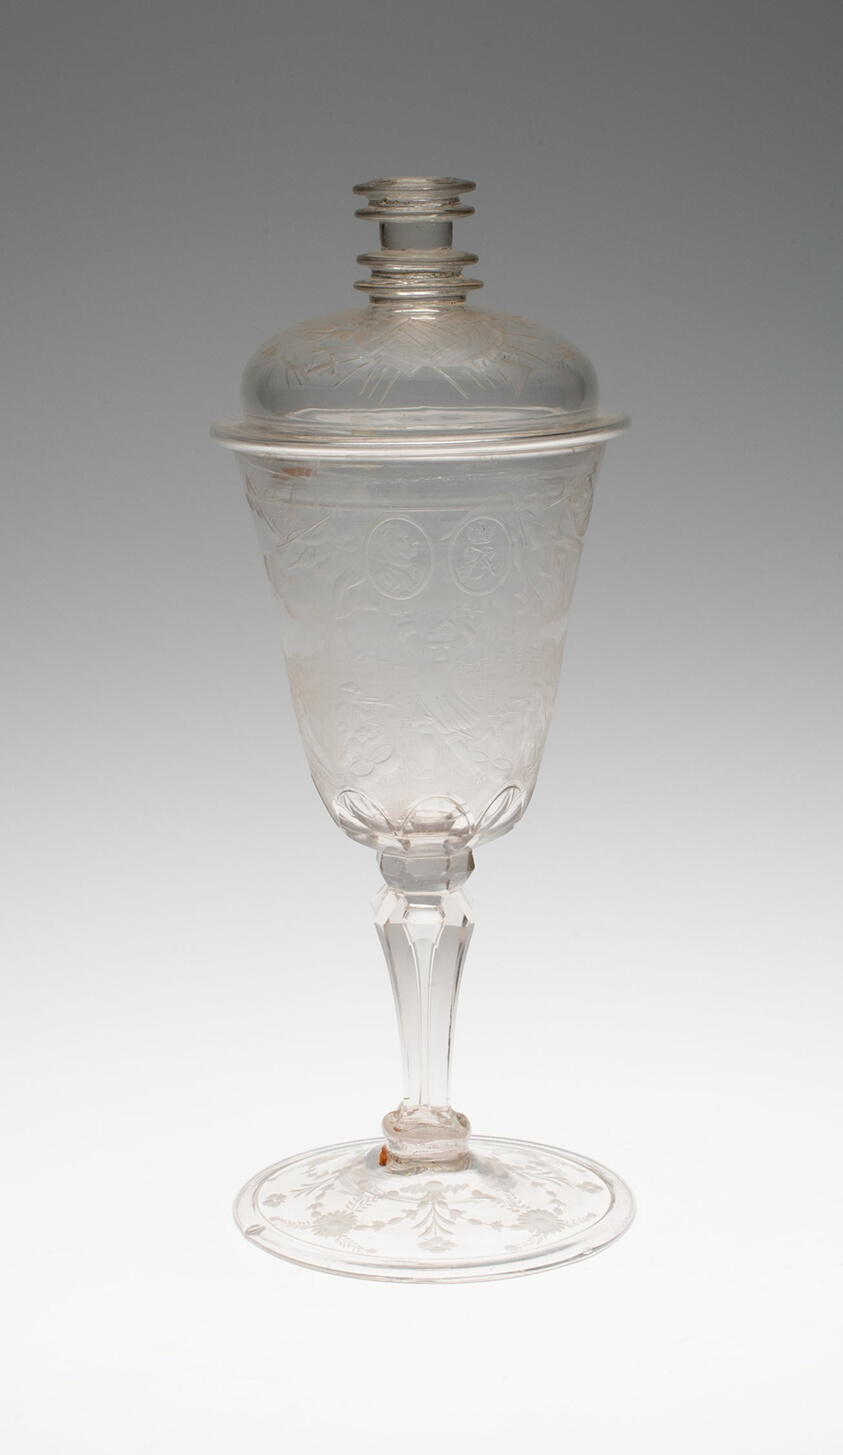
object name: Glass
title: Goblet with Cover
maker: Germany, Thuringia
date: 1701–1713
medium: Glass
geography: Thuringia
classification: drinking vessel; glass; european decorative arts